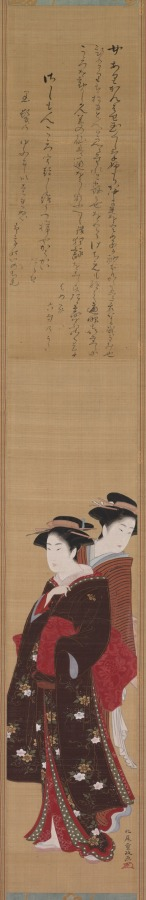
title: Two Beauties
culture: Japan, Edo period (1615–1868)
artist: Kitao Shigemasa (Japanese, 1739–1819)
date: late 1700s–early 1800s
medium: hanging scroll, pillar painting: ink and color on silk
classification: Painting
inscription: Artist's signature and seal, lower right corner. Poem inscribed on upper section of scroll.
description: Shigemasa favored using colors in broad opaque masses, as seen here in the beauties’ robes. He was a painter, printmaker, and poet, specializing in courtesan and actor prints. The format of this hanging scroll or "pillar painting" allows for the work to be hung on a pillar in a Japanese home.